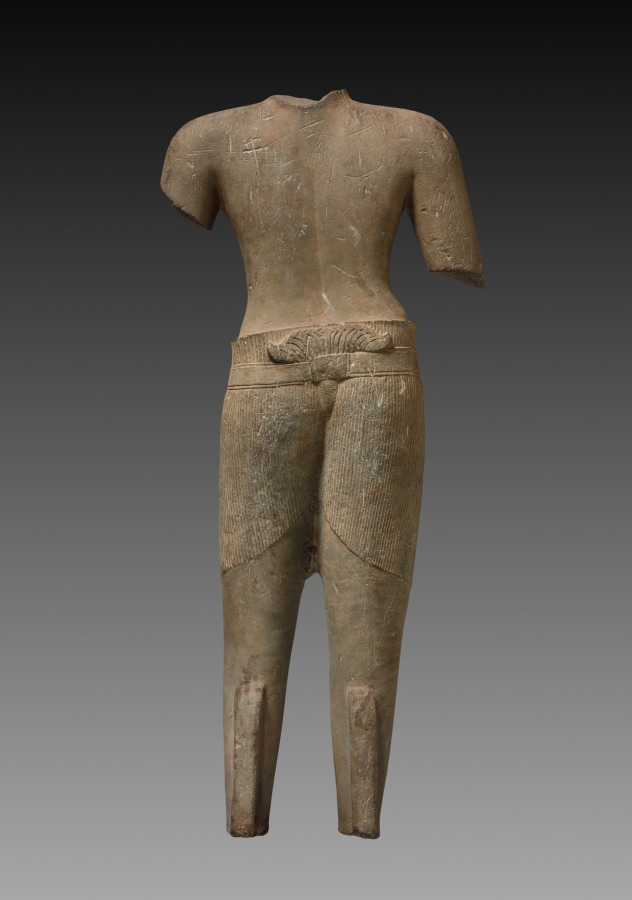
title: Male Deity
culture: Cambodia, Koh Ker-Khleong style, 10th century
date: 925–50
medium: sandstone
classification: Sculpture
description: The distinctive swath of pleated cloth and the anchor-shaped ends of the lower garment suggest that this sculpture was made when this method of wrapping the sampot was fashionable. During that time, Cambodian temples were dedicated to Hindu deities, whose images were dramatically installed alone on a pedestal in a temple's sanctum. When consecrated, gold tokens were installed under the pedestal; many sculptures were broken when people toppled them to get the gold.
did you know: This male deity seems to be striding with his left leg advanced subtly forward.